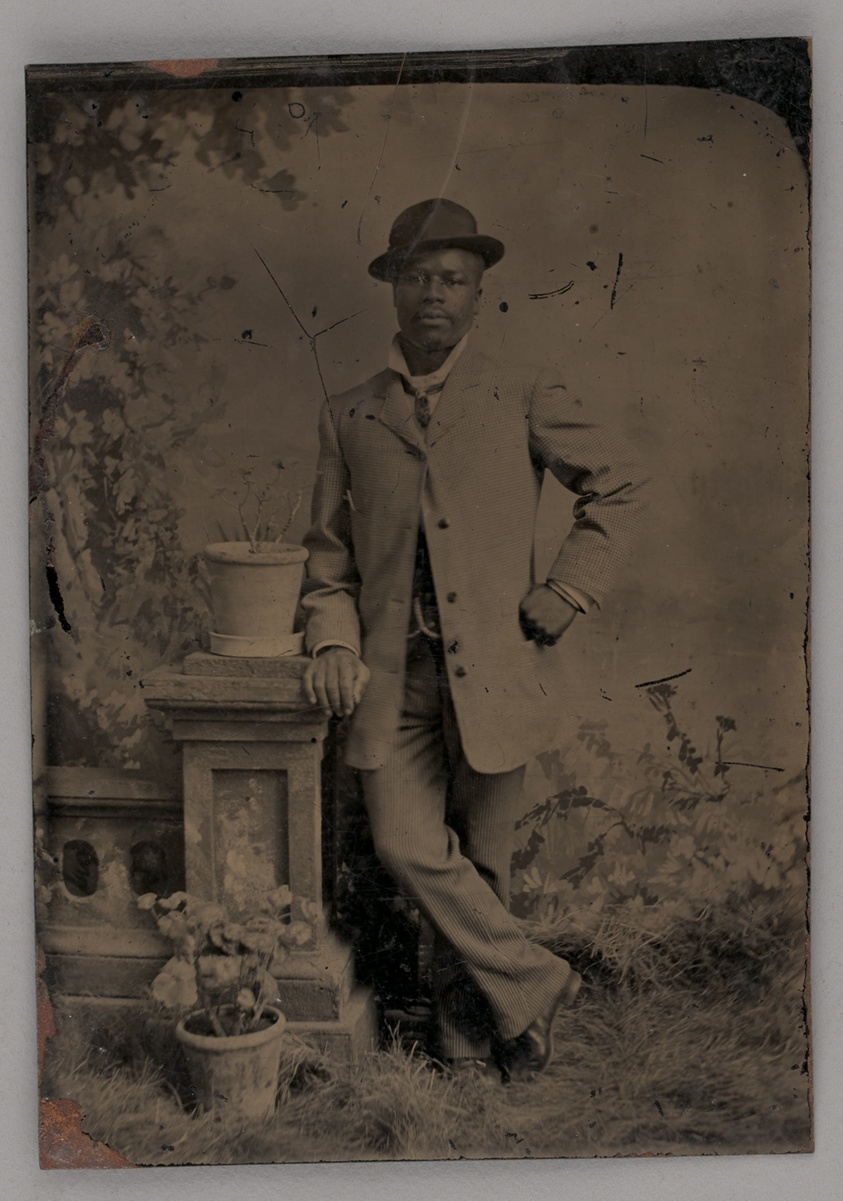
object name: Photograph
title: Untitled (Portrait of a Standing Man)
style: 19th century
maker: Unknown maker; American, 19th century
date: 1880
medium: Tintype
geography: United States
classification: portrait; tintype; photograph; photographic process; photography; portrait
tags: portraits: African American subject, lundberg collection, African American, portraits, men, Male, portraits: male subject, portrait